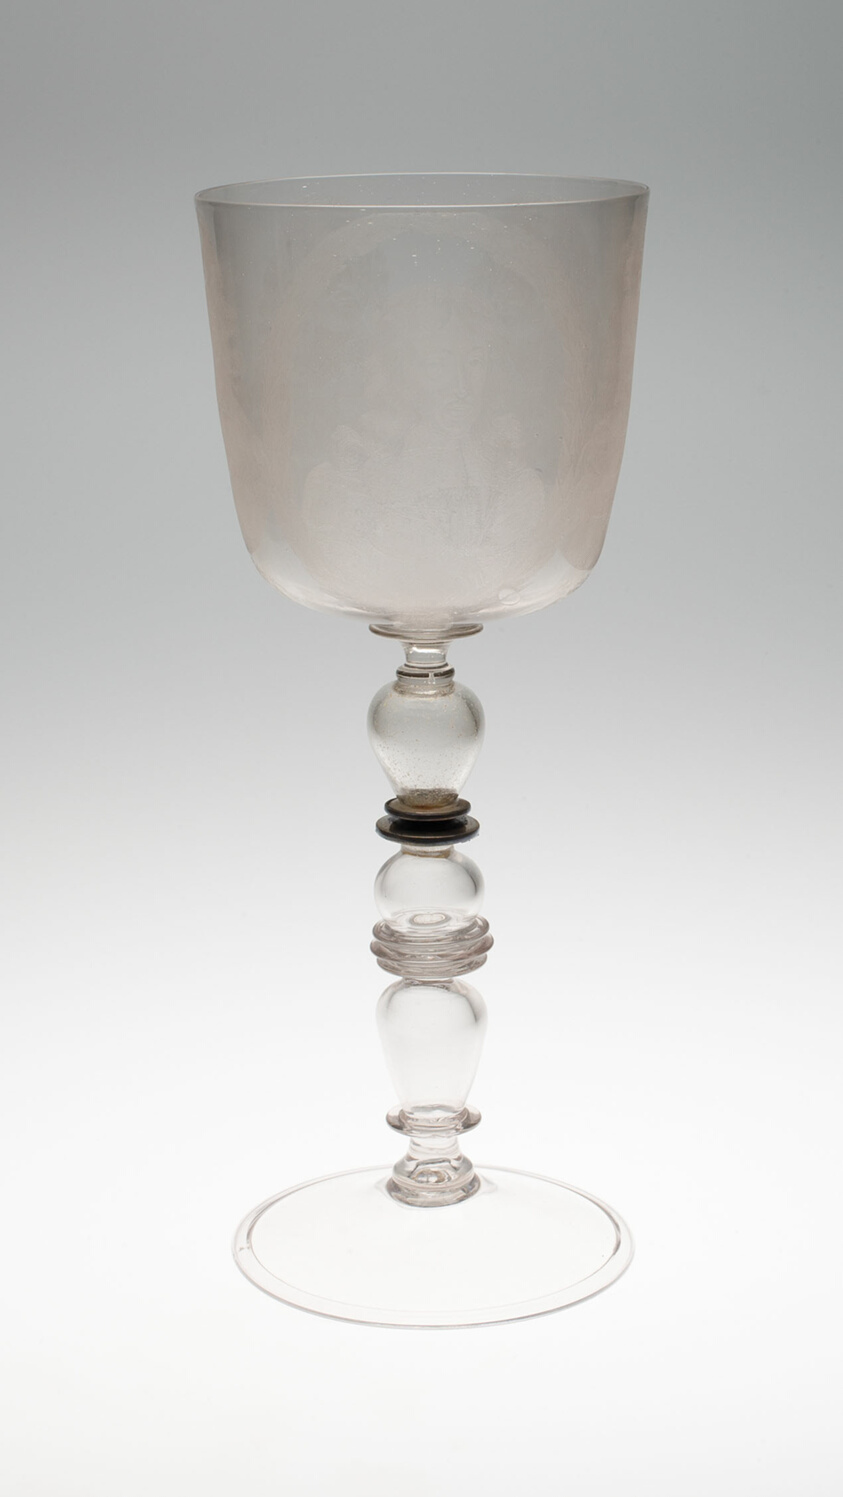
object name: Glass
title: Goblet (Pokal)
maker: Georg Schwanhardt; German, active mid-17th century; Nuremberg, Germany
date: c. 1660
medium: Glass and silver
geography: Nuremberg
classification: drinking vessel; glass; european decorative arts